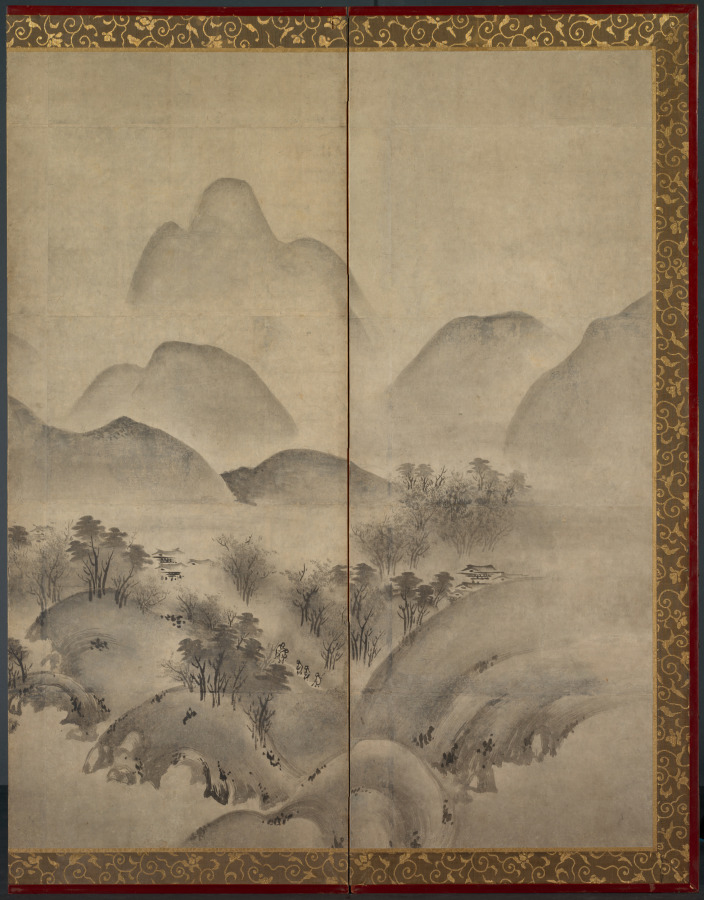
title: Moonlit Landscape (one of a pair)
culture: Japan, Muromachi period (1392–1573)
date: late 1500s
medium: six-panel folding screen, ink on paper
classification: Painting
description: This unsigned and unsealed composition includes imagery from the Eight Views of the Xiao and Xiang Rivers. Scanning the composition from right to left, four of the Eight Views subjects appear: sunset glow over a fishing village, returning sails off a distant shore, autumn moon over Lake Donting, and evening bell from a mist-shrouded temple. Not all the elements of the traditional Eight Views theme are here, but the artist suggests its literary presence by leading the viewer through a summer’s journey from one day to the next, aided, like the travelers in the landscape, by the light of the moon.